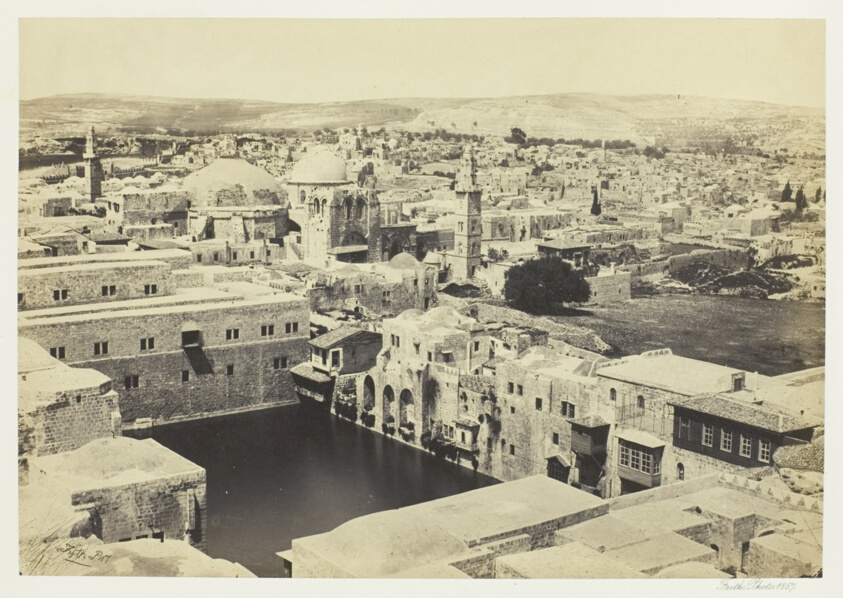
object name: Photograph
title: The Pool of Hezekiah, from the Tower of Hippicus, Jerusalum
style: 19th century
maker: Francis Frith (English, 1822–1898)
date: 1857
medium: Albumen print, pl. 4 from the album "Egypt and Palestine, Volume I" (1858)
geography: England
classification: photograph; albumen silver print; photography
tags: Collected by Hugh Edwards, Egypt and Palestine